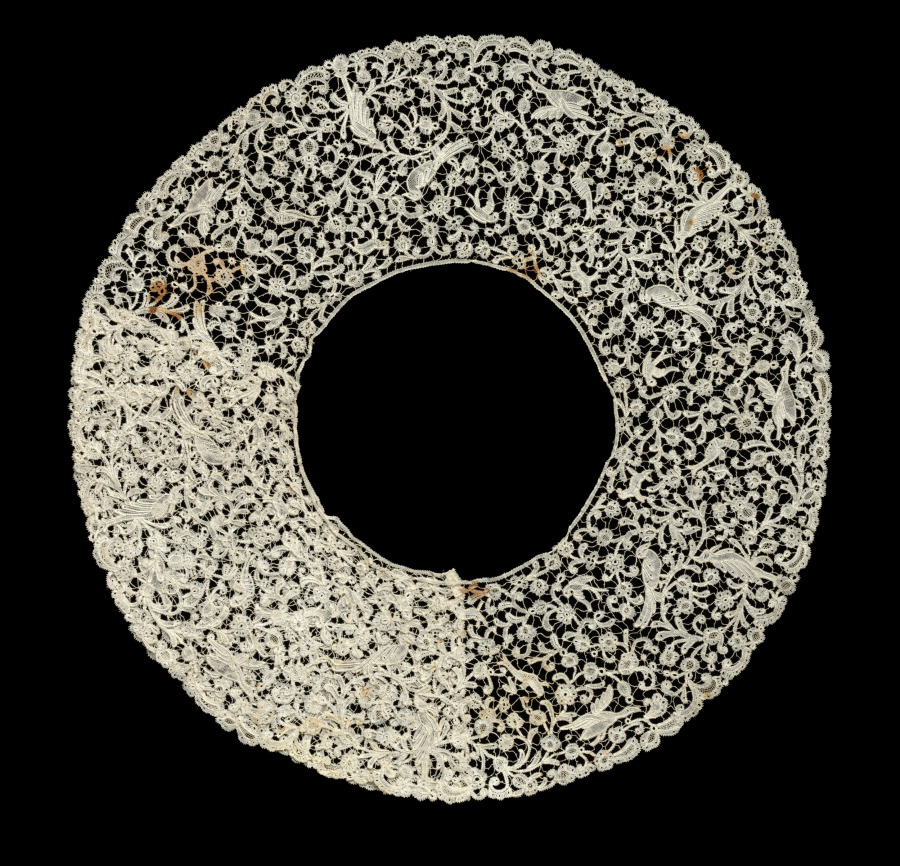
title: Lace Collar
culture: Flanders or Italy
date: 1800s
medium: Bobbin lace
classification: Lace